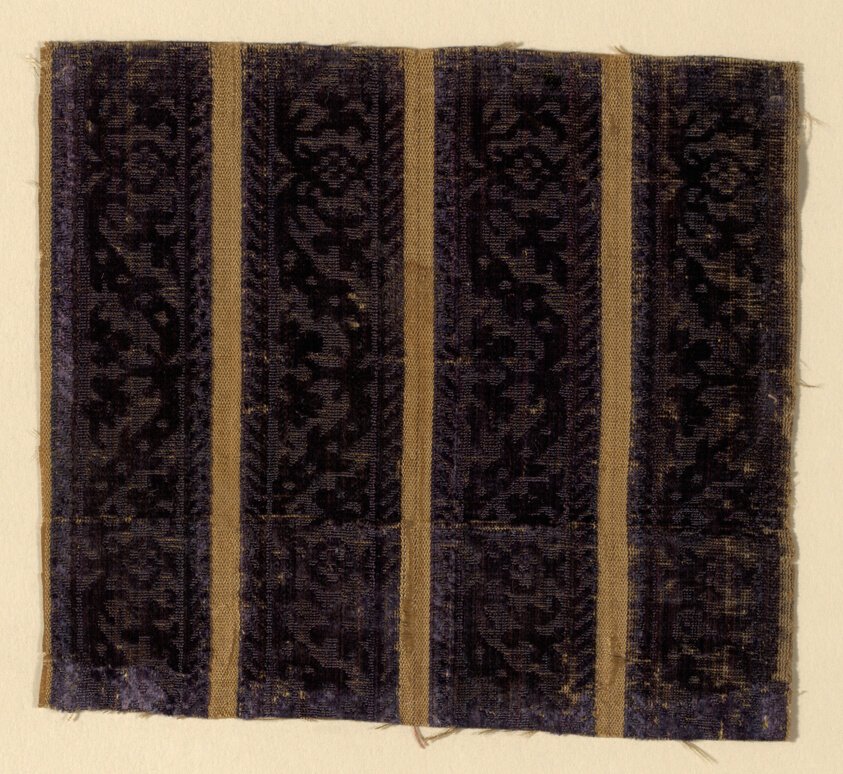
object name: Textile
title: Fragment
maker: Italy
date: Late 16th century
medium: cisele voided twill velvet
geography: Italy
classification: textile; weaving - velvet; weaving